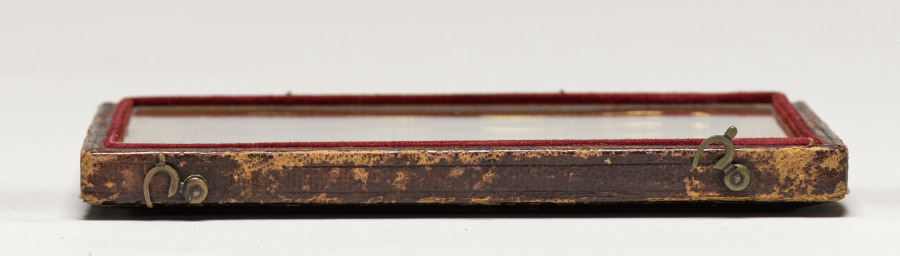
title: Two Children with Toys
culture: America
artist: Unidentified Photographer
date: c. 1855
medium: daguerreotype, quarter-plate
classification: Photograph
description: Children have always been particularly cherished subjects for photography. Portraits were made to preserve the memory of their stages of growth and, in an age when long-distance travel was rare, to share with faraway relatives. And, for a sadder reason: in 1840 an estimated one-third of children died before age five. Photography offered grieving parents the opportunity to immortalize their children’s features. This tragic genre of photographs, later called “post-mortems,” often depicts the children in fine clothing, laying down with eyes shut, as if merely napping.